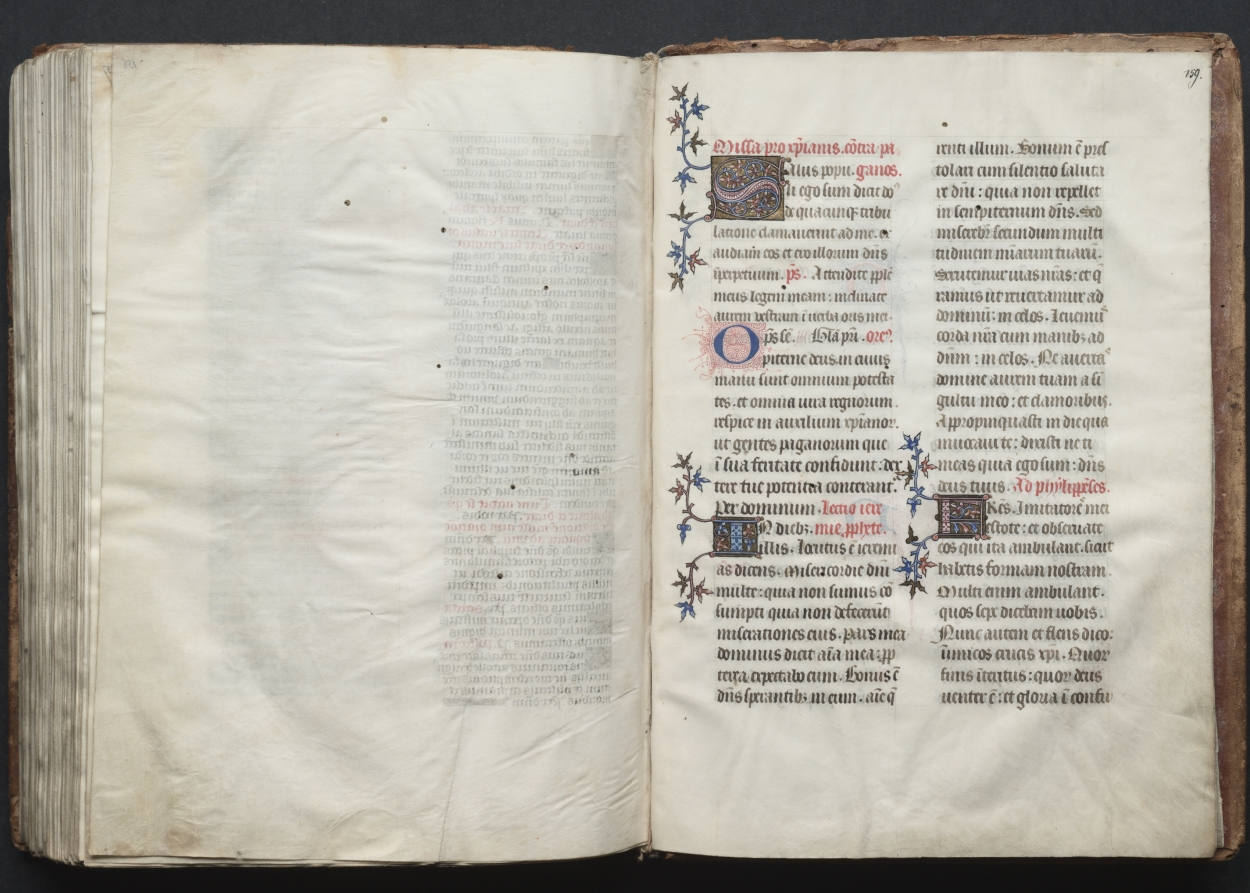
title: The Gotha Missal: Fol. 158v, Text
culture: France, Paris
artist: Master of the Boqueteaux (French)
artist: and Workshop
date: c. 1375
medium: ink, tempera, and gold on vellum; blind-tooled leather binding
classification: Bound Volume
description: The style and quality of this manuscript's decoration is typical of deluxe Parisian books made for aristocratic or royal patrons. Most of the book's decoration appears to be the work of the Master of the Boqueteaux, an artist active at the court of King Charles V (died 1380). His style was apparently shared by a number of book illuminators working in and around Paris. It is very possible that the Gotha Missal belonged to Charles V, but is not provable because the manuscript has no royal portraits and lacks a colophon. Given the book's magnificent decoration, however, it would seem that it was produced for a Valois prince, if not for the king himself. The manuscript receives its name from the German dukes of Gotha, its later owners.